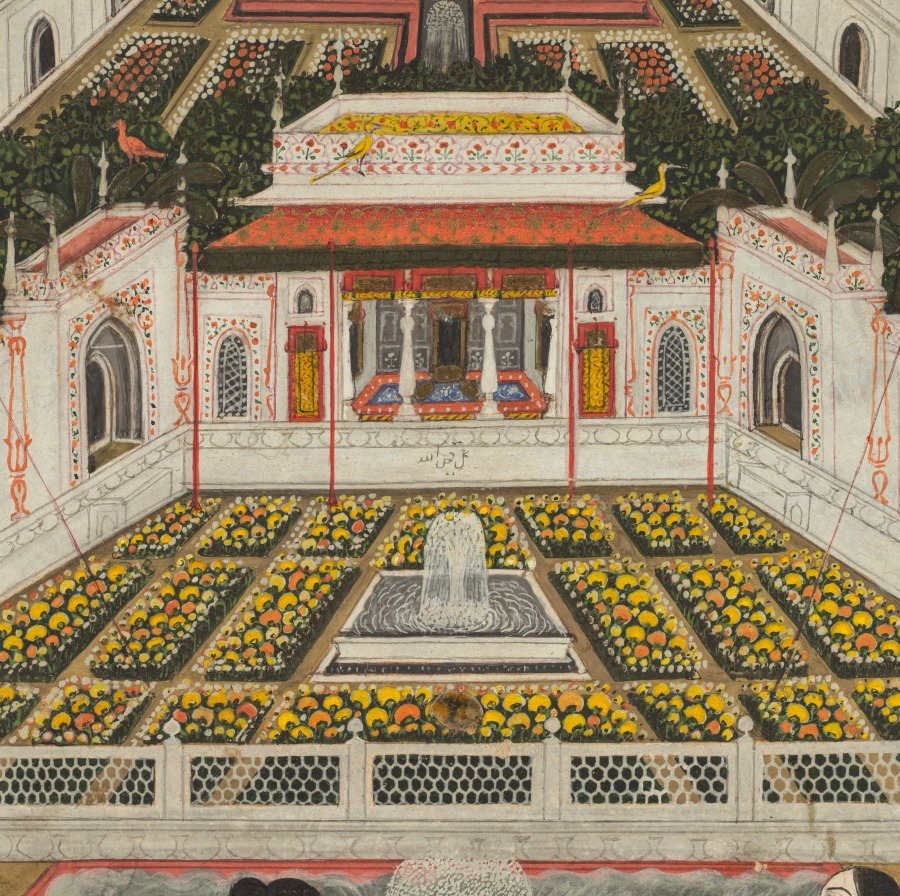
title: Women bathing before an architectural panorama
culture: India, Lucknow, Mughal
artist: Fayzullah (Indian, active c. 1730–1765)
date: c. 1765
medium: Gum tempera and gold on paper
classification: Painting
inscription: Persian inscription in center, on marble balustrade, in nasta‘liq script: The work of Fayzullah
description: Despite the wars waged and forts besieged in the background, life in the palace is carefree and luxurious. Some women enjoy hookahs and music on balconies, while others swim and drink liquor with abandon from Chinese porcelain cups and bottles. The artist has placed his name under the central pavilion, observing the scene across a formal garden of marigolds. The artist seems to have enjoyed experimenting with the idea of perspective, learned from European sources. He created a rapidly receding space that telescopes the view from the intimate harem quarters to the distant battlefields.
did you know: The artist signed his name below the king’s seat that overlooks the garden vista.